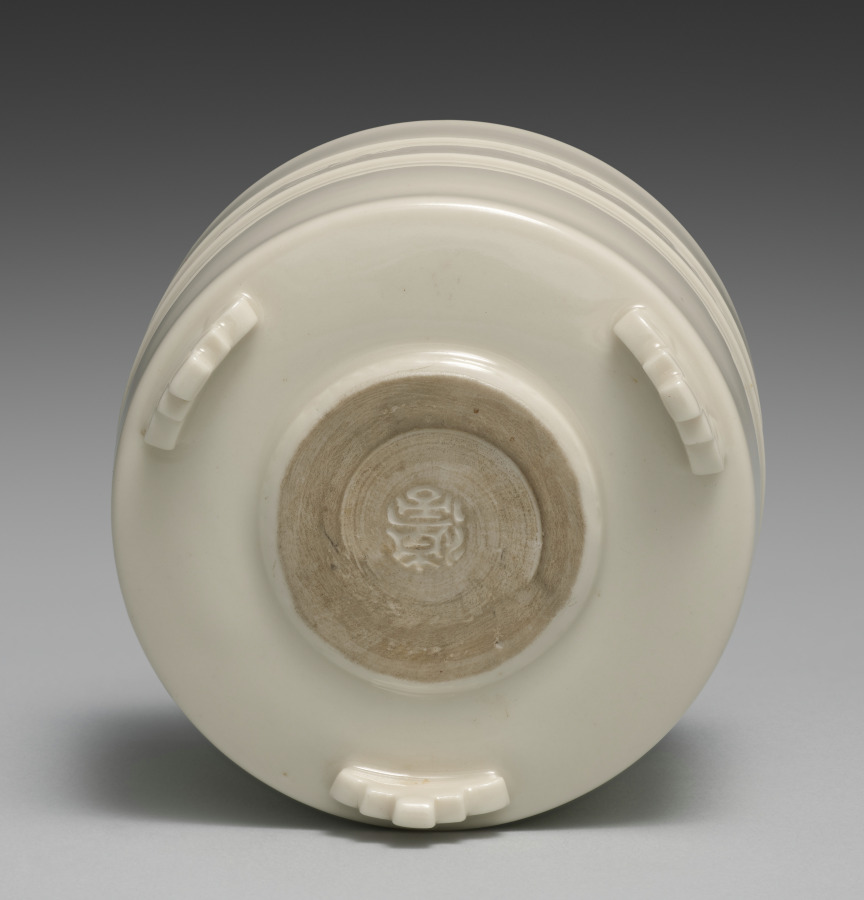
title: Incense Burner with Flowers and Dots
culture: Japan, Meiji period (1868–1912)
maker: Seifū Yohei III (Japanese, 1851–1914)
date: 1893–1914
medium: Porcelain with creamy white translucent glaze and molded and incised design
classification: Ceramic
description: Yohei III made incense burners in a wide variety of designs and styles. The body and glaze of this one are taihakuji, or “great white porcelain,” an important early invention Yohei III devised in 1872 that involved the combination of a distinctive translucent, creamy glaze over an ivory-colored clay body. The silver lid is meant to look like a single flower. The vessel has tapering legs with a combined curvilinear and geometric design; the bands encircling the middle have simple, incised flower motifs alternating with single dots.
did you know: This cylindrical incense burner has molded decorations on its creamy body.